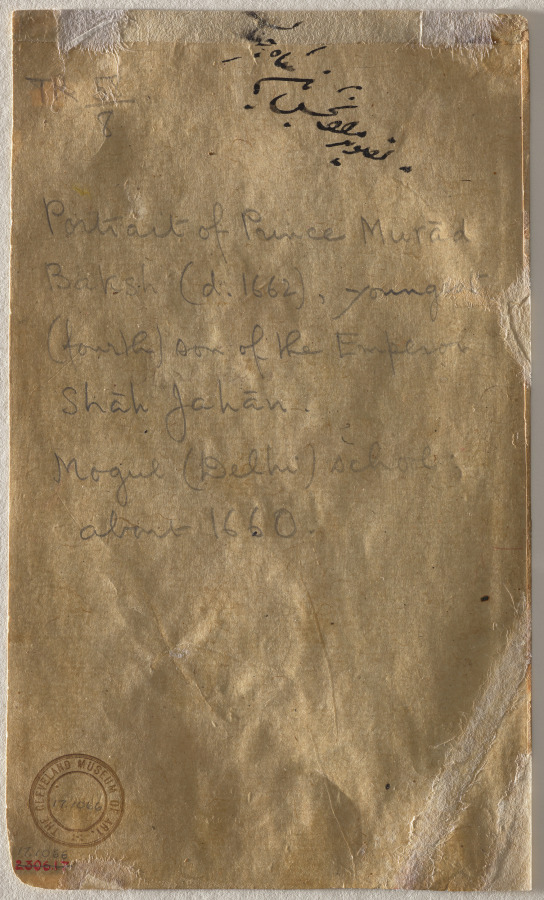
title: Portrait of Prince Murad Baksh (1624–1661)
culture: Mughal India, court of Shah Jahan (1627–58)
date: c. 1655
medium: Gum tempera and gold on paper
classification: Painting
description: This portrait depicts the Mughal prince Murad Baksh in his early 30s, at the height of his power and promise. He wears a golden coat of honor with fur collar and the swords and shield of a military officer. As the youngest son of Emperor Shah Jahan, he was intimately involved in the struggles for succession. In 1658, he sided with his brother Aurangzeb (1618–1707) against their eldest brother, the crown prince, whom they defeated in a decisive battle that led to the crown prince’s eventual assassination in 1659. Aurangzeb then turned on his youngest brother, Murad Baksh himself, and had him imprisoned and finally executed in 1661.